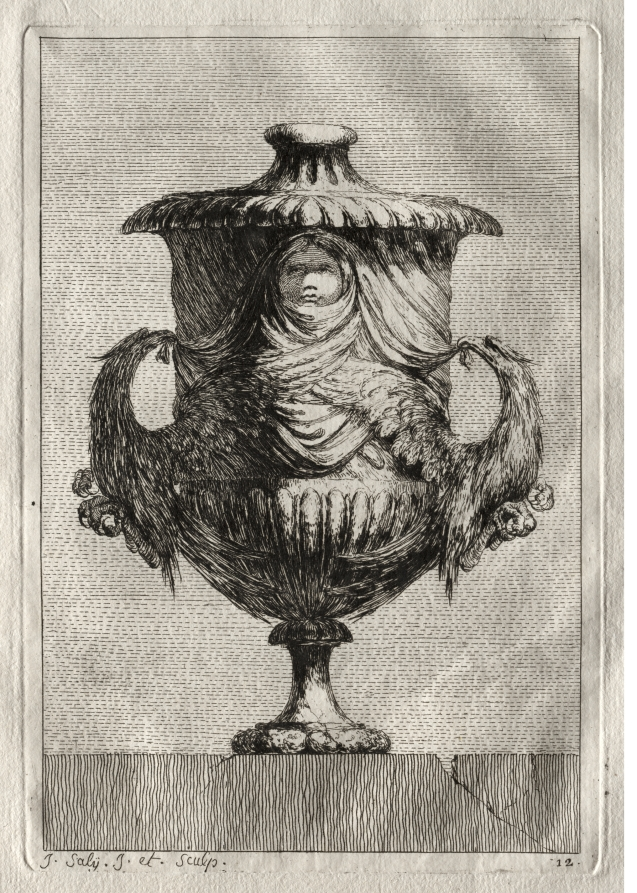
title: Suite of Vases: Plate 12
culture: France, 18th century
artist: Jacques François Saly (French, 1717–1776)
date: 1746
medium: etching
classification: Print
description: Trained as a sculptor, Saly etched a series of 30 vase designs while studying at the Académie de France in Rome. After his return to Paris, the publication announcement for the Suite of Vases endorsed the prints as an indication of the sculptor’s ingenuity and freedom of design. The vase designs also nourished an appetite for the revival of classical elements, or Neoclassicism, in decorative arts that developed in the mid-18th century.